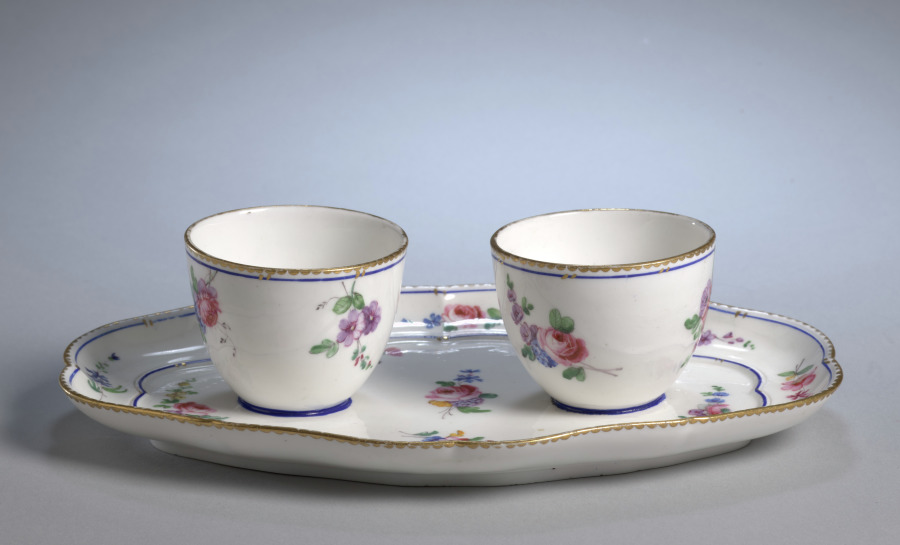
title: Jam Pots on Stand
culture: France, 18th century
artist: Sèvres Porcelain Factory (French, est. 1756)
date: c. 1760's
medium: porcelain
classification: Ceramic